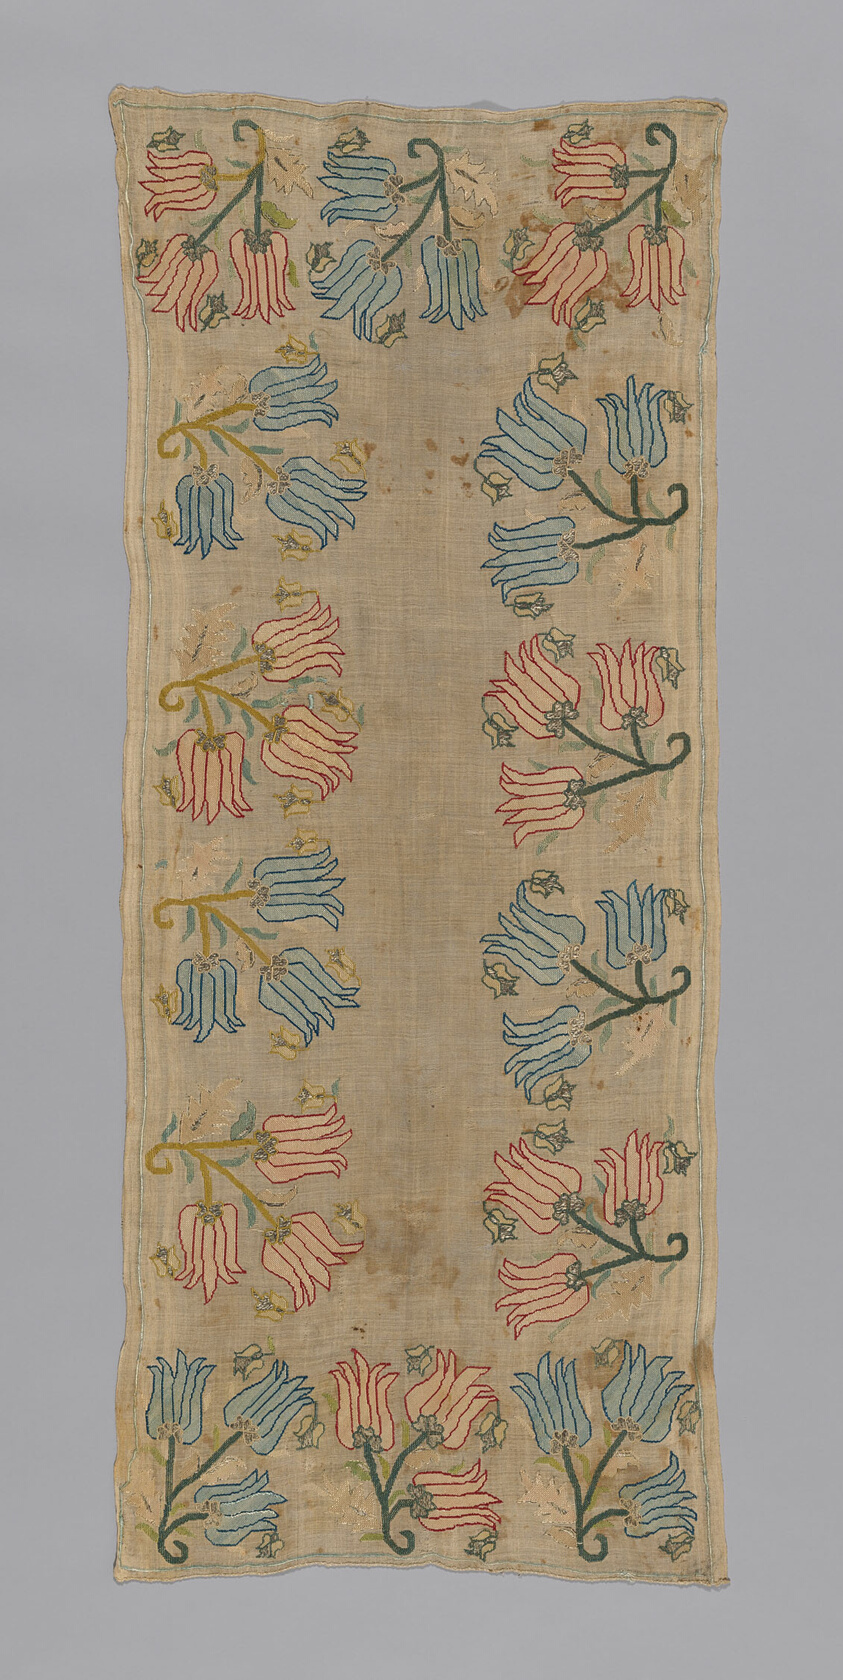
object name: Textile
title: Tray Cloth or Cover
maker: Turkey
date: 18th century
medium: embroidered in repeated tulips.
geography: Turkey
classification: textile; needlework (visual works); weaving